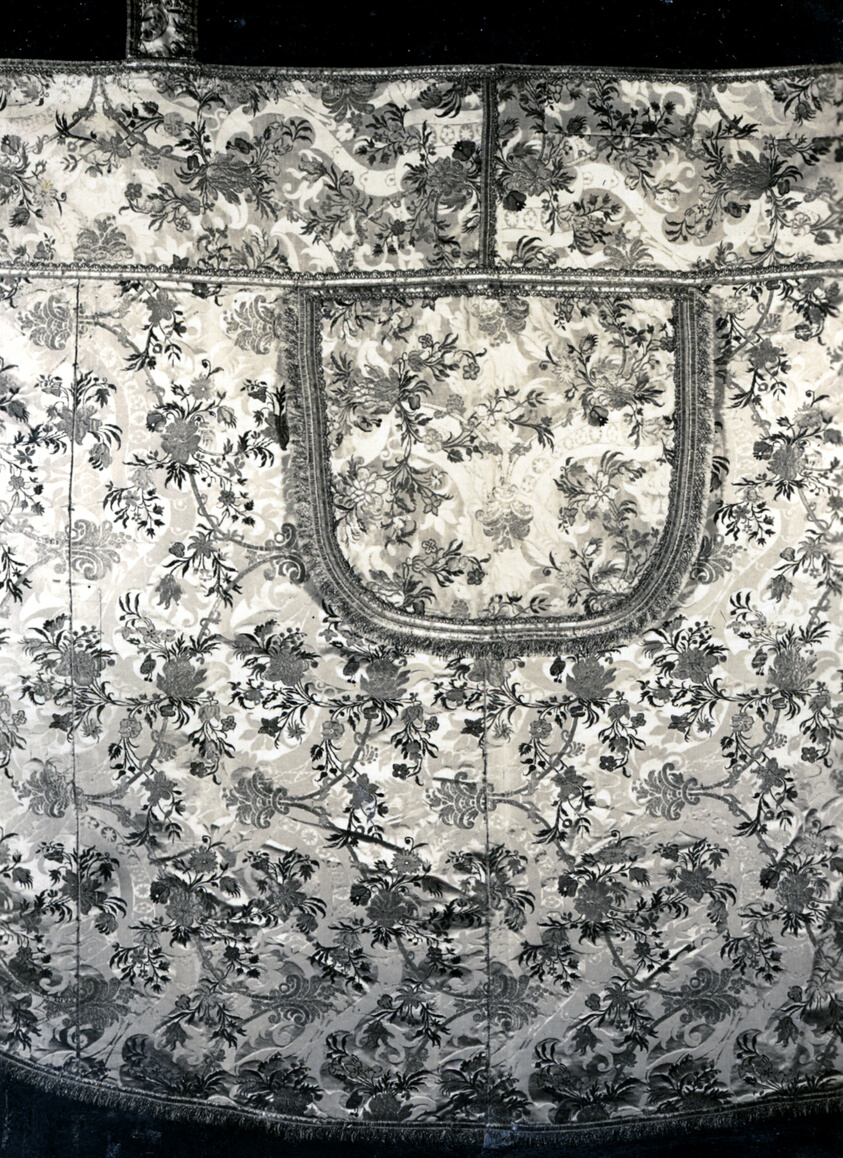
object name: Textile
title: Cope with attached Hood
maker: France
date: 1725/50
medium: Brocaded fancy compound satin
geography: France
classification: textile; weaving; costume; liturgical